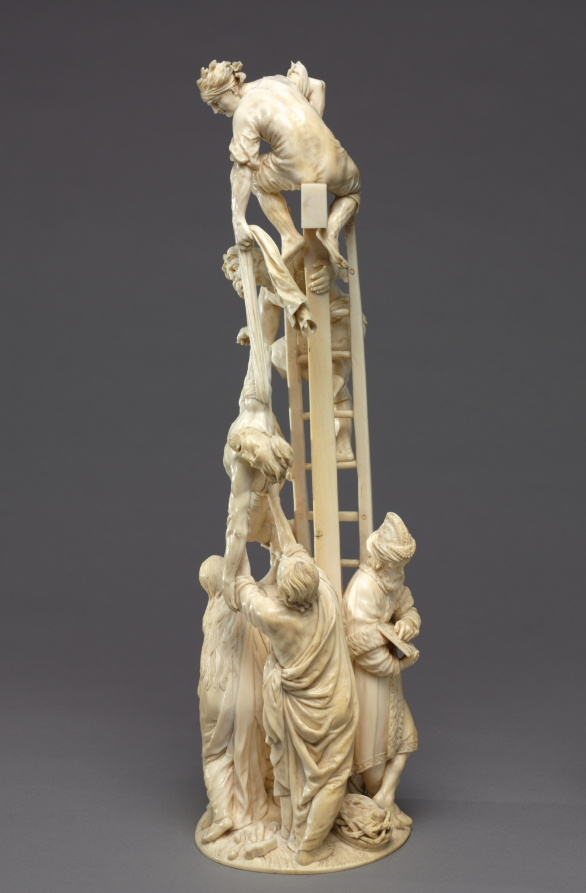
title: Descent from the Cross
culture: Austria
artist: Adam Lenckhardt (German, 1610–1661)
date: 1653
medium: ivory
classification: Sculpture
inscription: inscribed with monogram "AL" conjoined and dated 1653.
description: Carved from a single piece of ivory for Prince Karl Eusebius von Liechtenstein of Vienna, this work is a true tour-de-force. It took Lenckhardt seven years to complete; it is his last known sculpture and the pinnacle of his career. The biblical accounts of the descent from the cross found in the gospels are not consistent, which may contribute to the difficulty in precisely identifying the figures. The Virgin Mary, Saint John, Mary Magdalene, and others were said to be present, but undoubtedly there are other disciples here mourning Christ’s death. The intense emotion registers on the faces of the figures in the scrupulous and exquisitely detailed work.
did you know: Carved from a single elephant tusk, the artist took special care to ensure the ivory did not crack or break as he meticulously crafted each figure in this visually exciting sculpture. Look closely to find tools and small objects included near its base.